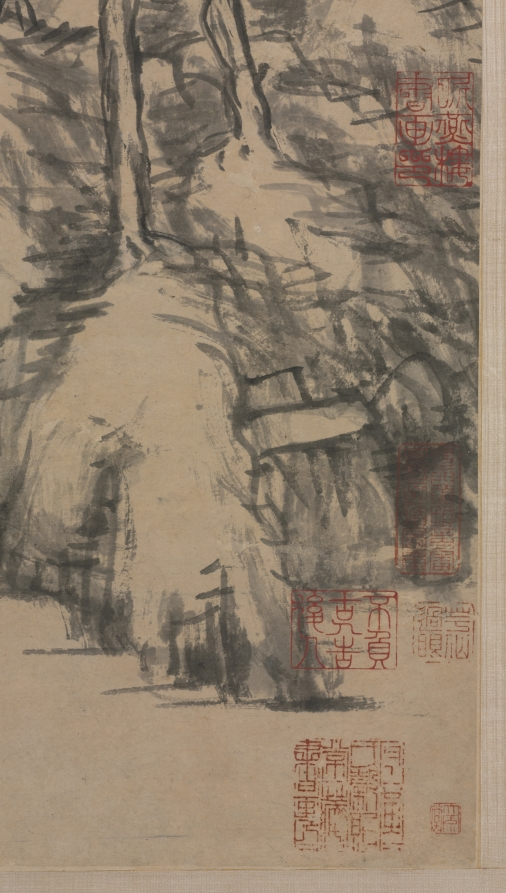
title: Landscape after Guo Zhongshu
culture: China, Qing dynasty (1644-1911)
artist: Bada Shanren (Chinese, 1626–1705)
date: c. 1680–1705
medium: Hanging scroll; ink on paper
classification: Painting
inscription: Artist's inscription, signature, and 3 seals: Painting after Guo Shuxian [Guo Zhongshu]. Bada shanren. [2 seals] Shanren; Kede shenxian 可得神仙. [seal, lower left corner] Yaozhu 遥属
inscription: 8 additional seals: 1 of Li Shifen (1821-1885); 4 of Chang Yüan 張爰 [Zhang Daqian 張大千] (1899-1983); 3 unidentified.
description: Similar to some calligraphers of his time, Zhu Da rejected conventions in favor of an individual, personal expression. He is known for ambiguous compositions of fish, flowers, birds, and rocks in contrasting ink tonality. As a member of the Ming imperial family, Zhu lost his princely status and hid in a monastery when the Manchus, foreigners from the north, established the Qing dynasty in 1644. In this late work, mountain ranges are rendered in diverse and dense strokes rising toward the top of the scroll. It references the artist Dong Qichang (1555–1636) in concept. Yet the cursory brushwork and composition present Zhu’s personal style.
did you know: Zhu Da's inscription acknowledges that this painting was done after the early Song master Guo Zhongshu 郭忠恕, but there is almost no tangible stylistic relation to be found between Zhu Da and his 10th-century model.